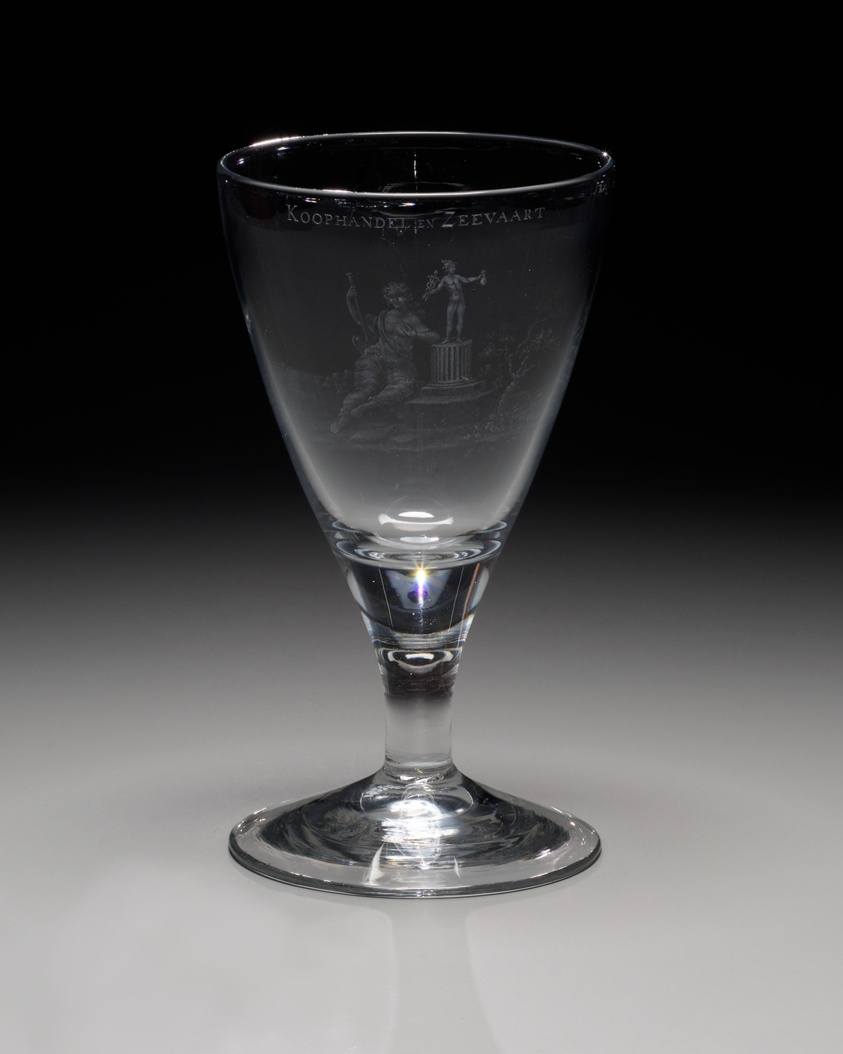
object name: Glass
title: Wine Glass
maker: England or Netherlands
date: Late 18th century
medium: Glass; stipple engraved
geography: England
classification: drinking vessel; glass; european decorative arts